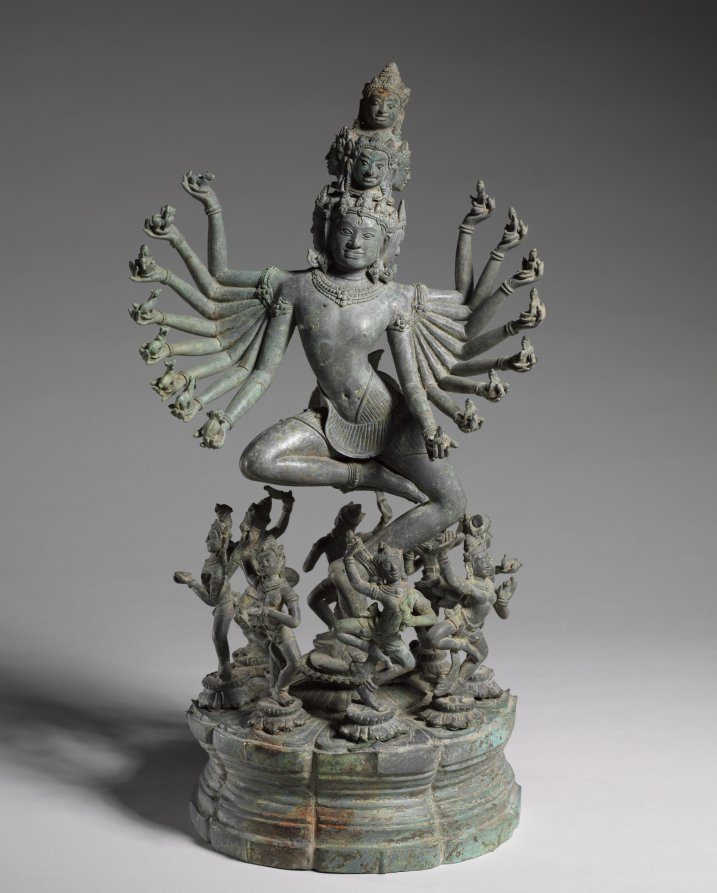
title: Hevajra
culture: Northeastern Thailand, former kingdom of Angkor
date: c. 1200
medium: Bronze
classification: Sculpture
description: Hevajra was an important figure signaling the practice of Buddhist rituals. King Jayavarman VII placed particular emphasis on Hevajra during consecration rituals and set up a colossal stone sculpture of dancing Hevajra at the east gate of his fortified city in the Khmer capital at Angkor. In the Cambodia of Jayavarman VII, tantric Buddhism became public and widespread, practiced together with other more mainstream forms of Buddhism, Hinduism, and ancestor worship. The iconography of Hevajra is described in detail in a text that bears his name, the Hevajra-tantra, first composed in India probably in the 800s. Hevajra has eight heads, sixteen arms, and four legs. His left hands hold images of Indic gods; wealth, death, sun, moon, fire, wind, water, and earth. In his right hands are animals: bull, lion, human, cat, camel, sheep, horse, and elephant. They all sit in skull cups, objects also used in tantric rituals. He dances on a corpse that embodies ignorance and is surrounded by eight yoginis who dance triumphantly in a ring around him. Yoginis functioned as intercessors between human practitioners and enlightened beings. Many bronze images of Hevajra were made during the reign of Jayavarman VII, but few survive in as pristine condition as this example. According to scientific analysis and curatorial reports, this sculpture survived in a clay vessel submerged in water, which accounts for its high tin content and unusual gray patina. Samples from the clay core reveal the presence of the mineral feldspar, a characteristic of clay from the Isaan plateau, on the other side of the mountain range not far from Banteay Chhmar, in present-day Thailand.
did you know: Hevajra, the Tantric Buddhist deity who personifies Enlightenment, dances vigorously to symbolize the human soul's liberation from the snare of existence.